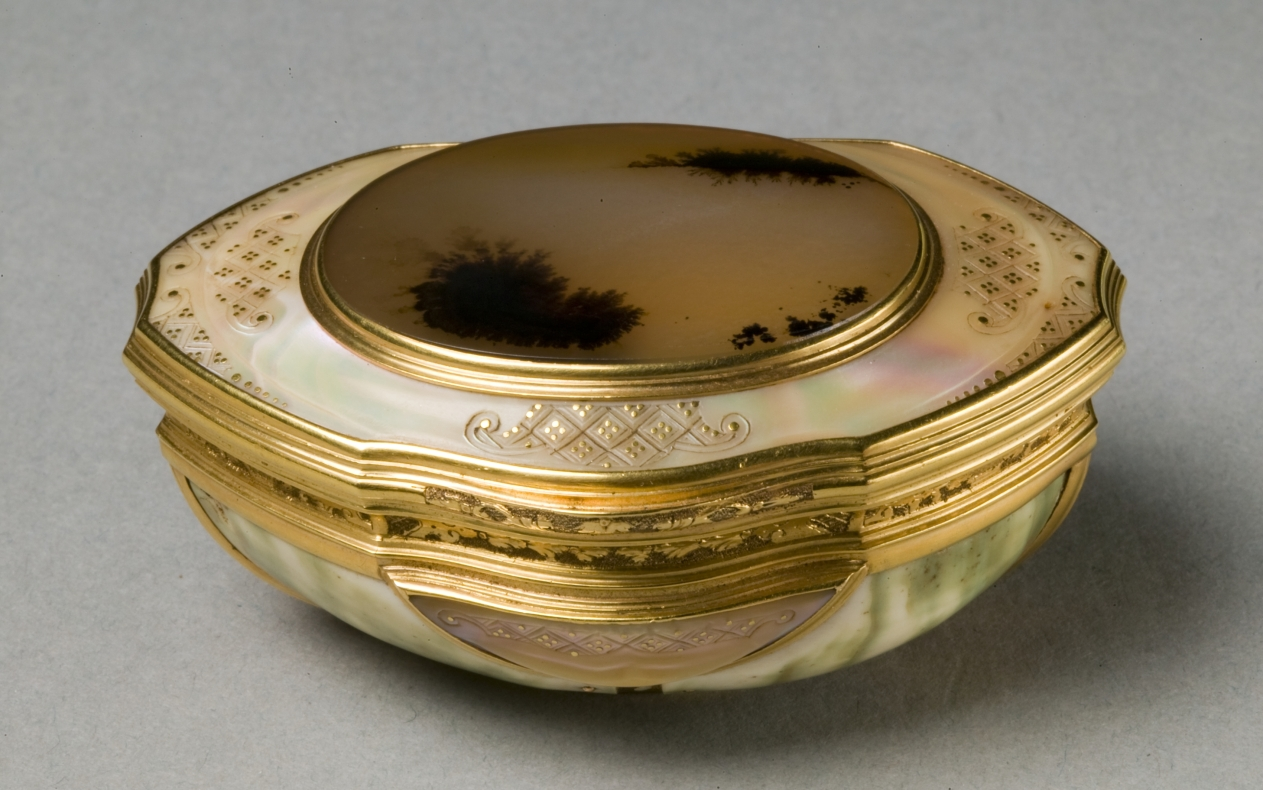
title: Snuff Box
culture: Germany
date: c. 1730–40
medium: goldmounted agate and mother-of-pearl and shell, original sharkskin case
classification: Miscellaneous